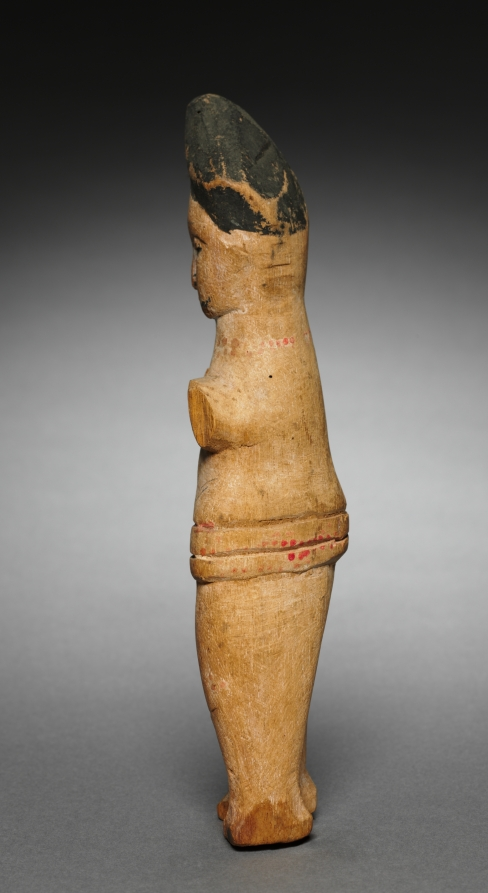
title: Doll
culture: Africa, West Africa, Nigeria, Ibibio style, unknown artist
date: 1900s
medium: Wood, kaolin, and paint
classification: Sculpture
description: Young Ibibio girls would play with dolls for fun. The dolls also took on deeper significance when a girl entered seclusion to go through preparations for adulthood and marriage, representing her future children and promoting her fertility. The kaolin (white clay) that once covered the figures' bodies has been worn off, possibly through handling during play. Thin lines represent uli, a kind of body painting. Upraised, foreshortened hands with open fingers were typical of dolls carved by Ibibio people from the Anang group.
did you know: Dolls like this were sold at markets where they were purchased as symbolic playthings for girls or souvenirs for tourists.